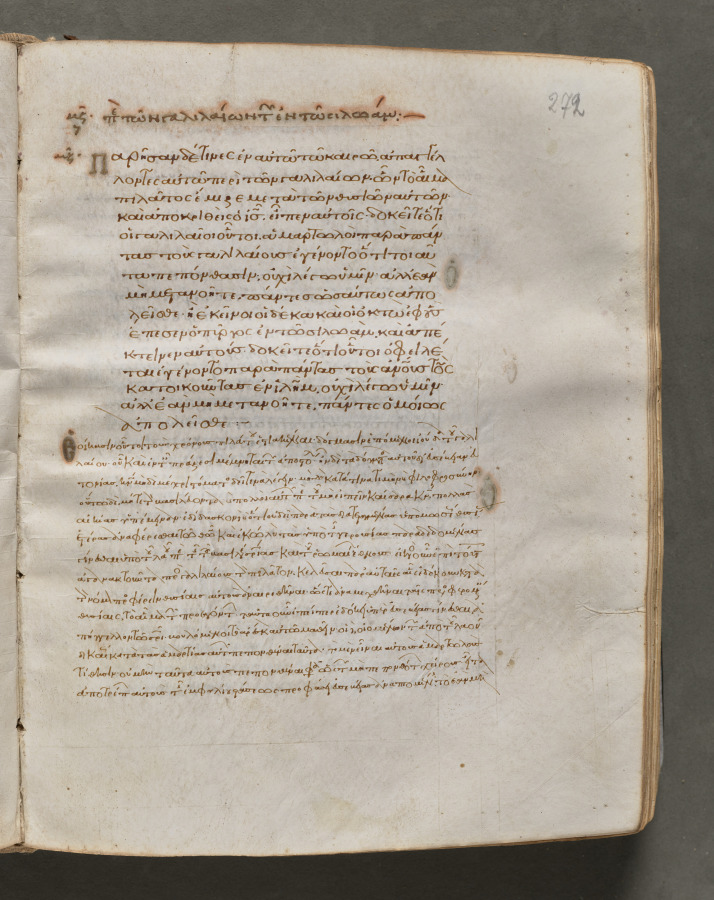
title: Text, folio 272 (recto), from a Gospel Book with Commentaries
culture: Byzantium, Constantinople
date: c. 1000–1100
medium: ink, tempera, and gold on vellum; leather binding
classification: Bound Volume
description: Each of the four gospels in this book opens on a page with brilliantly illuminated borders depicting the author of the text as well as birds—principally peacocks, symbols of the immortality of the soul—and fountains, representing the fountain of life and the salvation of the soul. This volume consists of 428 leaves with texts in Greek. Its level of sophistication suggests that it was probably written and decorated in a monastery in Constantinople.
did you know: Gospel books were carried in procession through Byzantine churches.